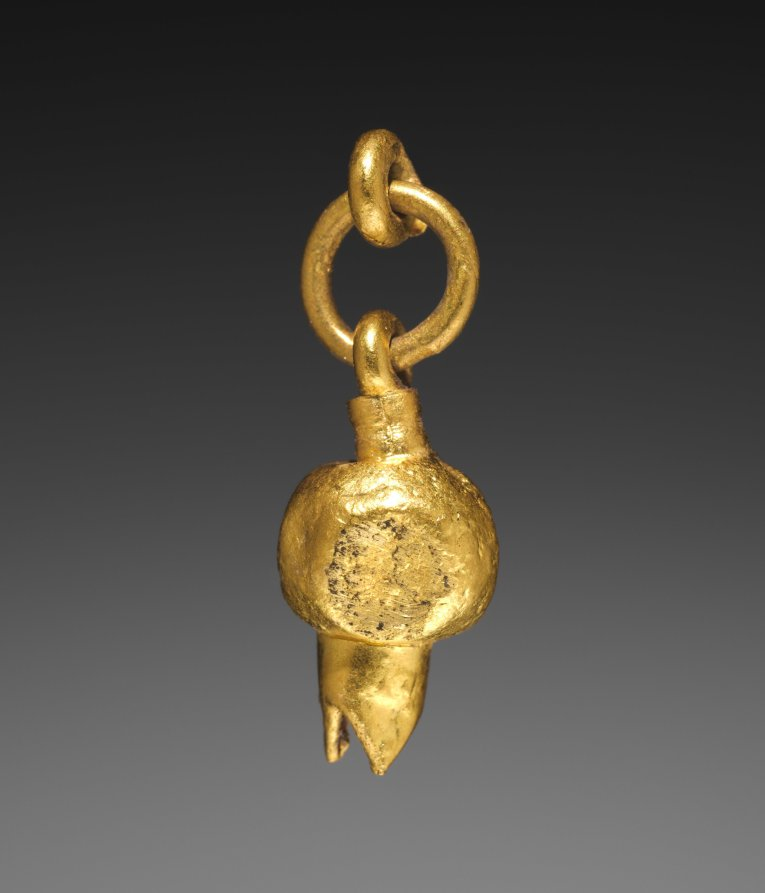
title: Pendant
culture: Parthian Empire (247 BCE–224 CE)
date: 1–200 CE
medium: gold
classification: Jewelry